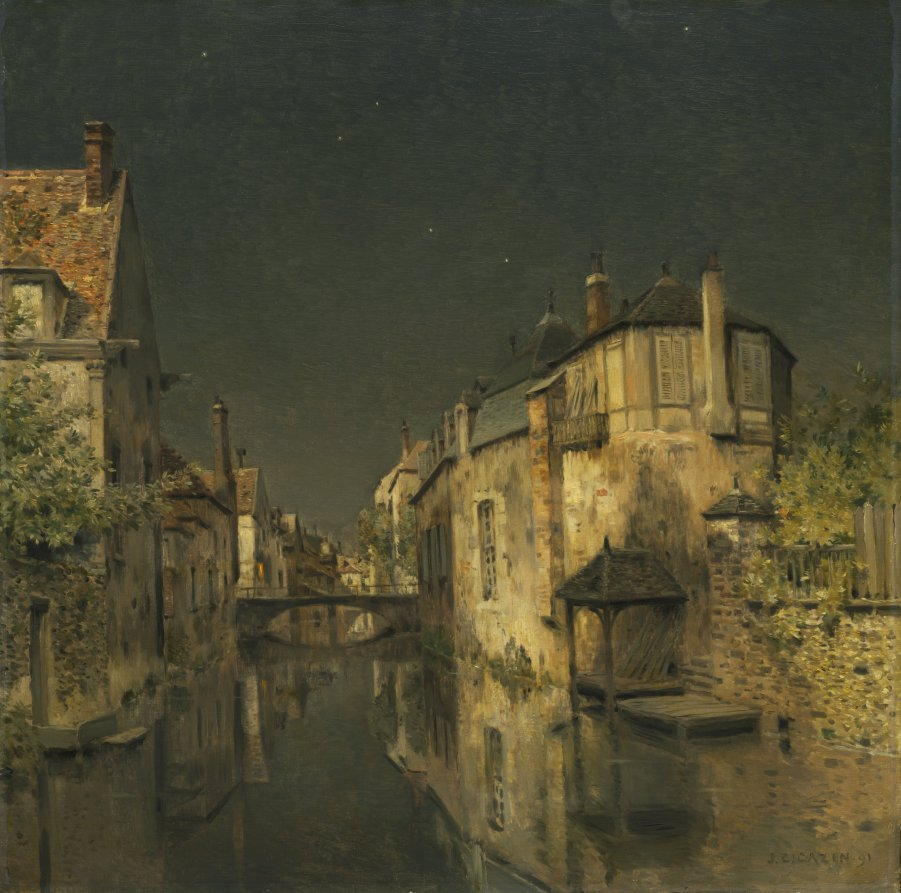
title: Midnight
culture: France, 19th century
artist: Jean-Charles Cazin (French, 1841–1901)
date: 1891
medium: oil on fabric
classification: Painting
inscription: Signed lower right: j. c. cazin. 91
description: This painting depicts Abbeville, a city in northern France famous for its canals and architecture. It lies near the seaport of Boulogne-sur-Mer, Cazin's hometown and where he spent the last decades of his life painting the countryside, beaches, and nearby towns. Cazin specialized in landscapes, often influenced by his knowledge of English and Dutch painters. The title, Midnight, and the image itself suggest silence and stillness—Cazin's hallmarks—but only rarely did he attain this almost surrealistic atmosphere. Cazin was educated in Paris at the famous Ecole Gratuite de Dessins (Free School of Drawing), an innovative and unorthodox institution teaching drawing from memory. He studied there with fellow artists Henri Fantin-Latour (1836–1904), Auguste Rodin (1840–1917), and Alphonse Legros (1837–1911). They all shared an interest in Symbolism—the movement that sees symbols in reality and perceives reality through symbols.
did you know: Cazin preferred to paint in his studio using memory techniques learned in his artistic training which he later passed on to his own students.